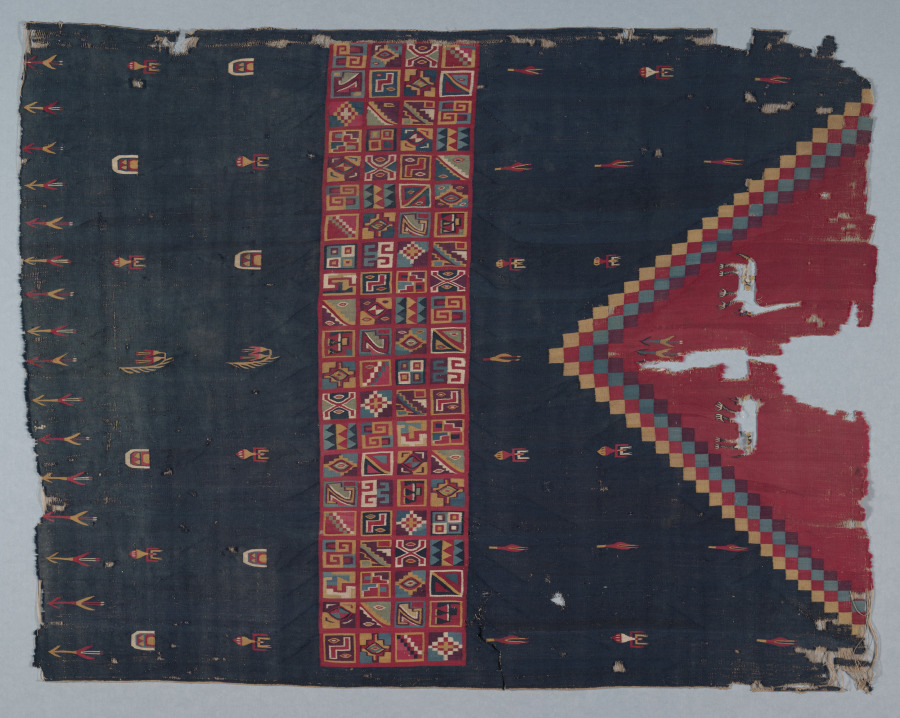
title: Half Tunic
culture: Peru, South Coast, Inca Culture, Colonial Period, 16th century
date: 16th century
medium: interlocked tapestry; cotton and wool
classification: Textile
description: The "t'oqapu" waistband and the deep V-yoke were standard decorations of Inca tunics. However, the fantastic animals represented in the yoke and the floral motifs in the main field identify this tunic as dating after the Spanish Conquest in 1532.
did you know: In Inca times, only the ruler and select nobles had the privilege of wearing t'oqapu tunics.